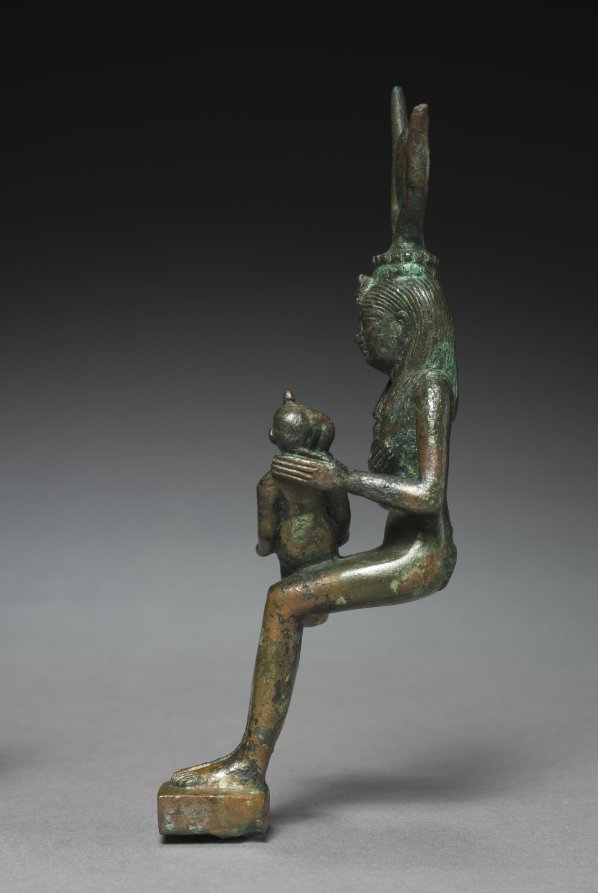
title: Statutette of Isis and Horus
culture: Egypt, Greco-Roman period (332 BCE–395 CE), Ptolemaic dynasty (305–30 BCE)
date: 305–30 BCE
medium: bronze, solid cast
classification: Sculpture